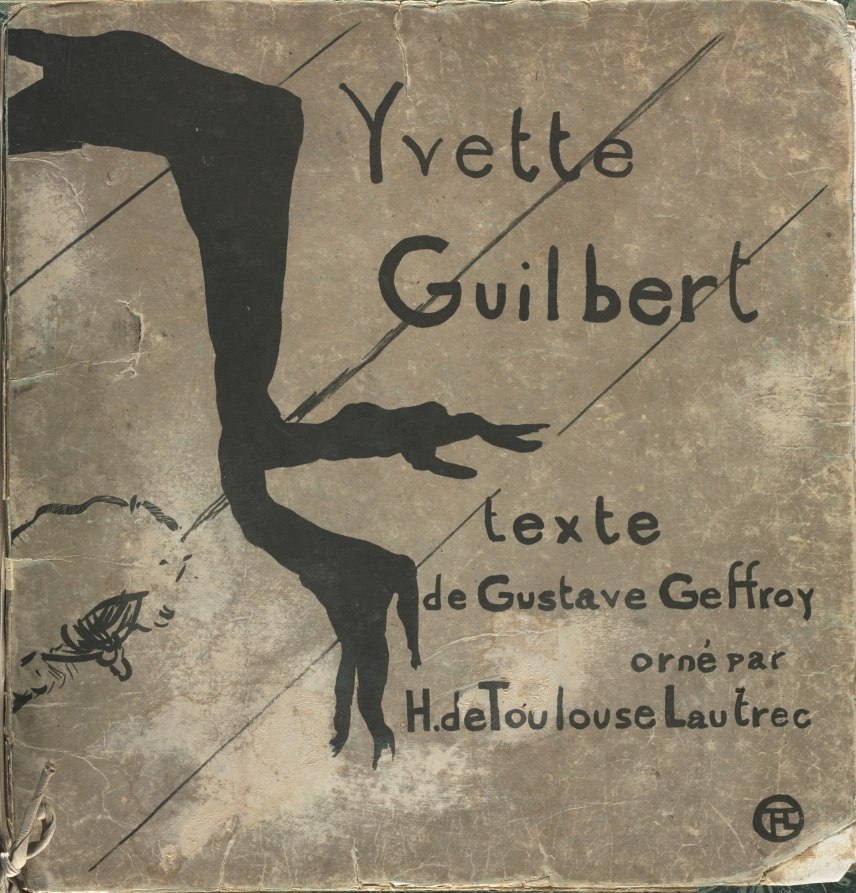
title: Yvette Guilbert-French Series: Cover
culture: France, 19th century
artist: Henri de Toulouse-Lautrec (French, 1864–1901)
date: 1894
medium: lithograph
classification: Bound Volume